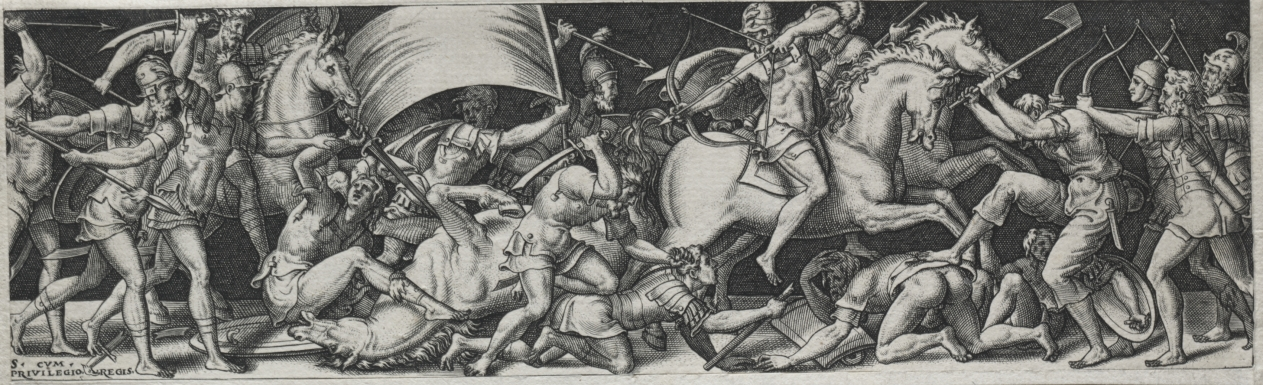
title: Combats and Triumphs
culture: France, 16th century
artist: Etienne Delaune (French, 1518/19-c. 1583)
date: probably 1560s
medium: engraving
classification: Print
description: Etienne Delaune (French, 1518/19-1583) Combats and Triumphs, probably 1560s Engravings Gift of Leonard C. Hanna 1924.671-.674 The Triumph of Bacchus Battle of Men and Animals Combat of the Naked Men Battle of the Centaurs and the Lapiths The four prints shown here come from a series of twelve known as the Combats and Triumphs. The friezelike composition reflects the artist's study of marble relief carvings on Greek and Roman sarcophagi (coffins), here reduced to a preciously small setting. Against a flat, stagelike background, Delaune's balletic warriors engage in a Mannerist version of artificial war. Etienne Delaune was inspired by the art created at Fontainebleau, but he worked in Paris and then Strasbourg during the late 1500s. His small, exquisitely executed engravings reflect his training as a goldsmith and his work as a medallist.